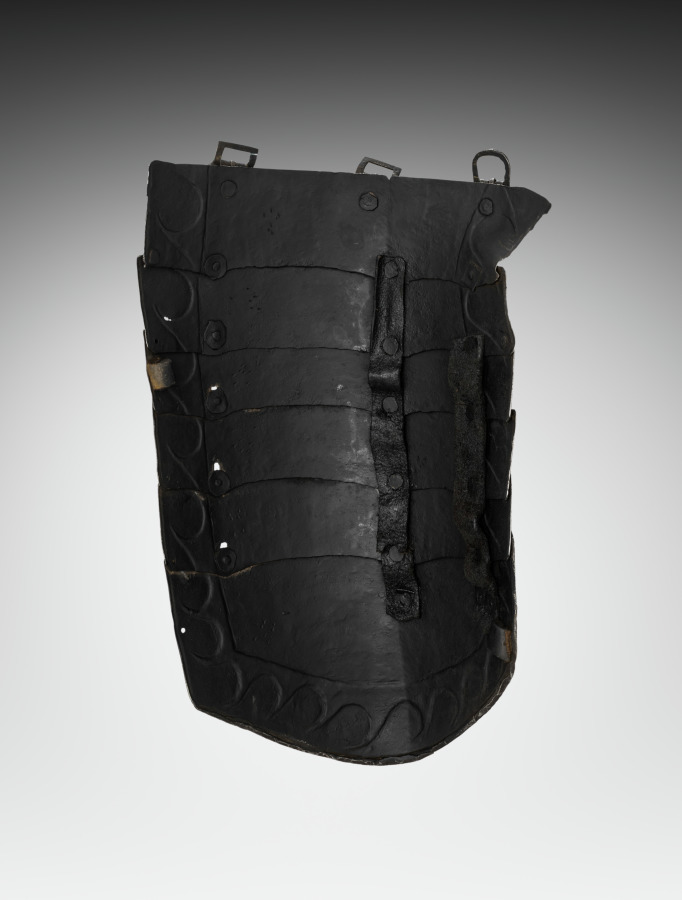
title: Tasset (2 of 2)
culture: Germany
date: c. 1540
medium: steel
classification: Arms and Armor